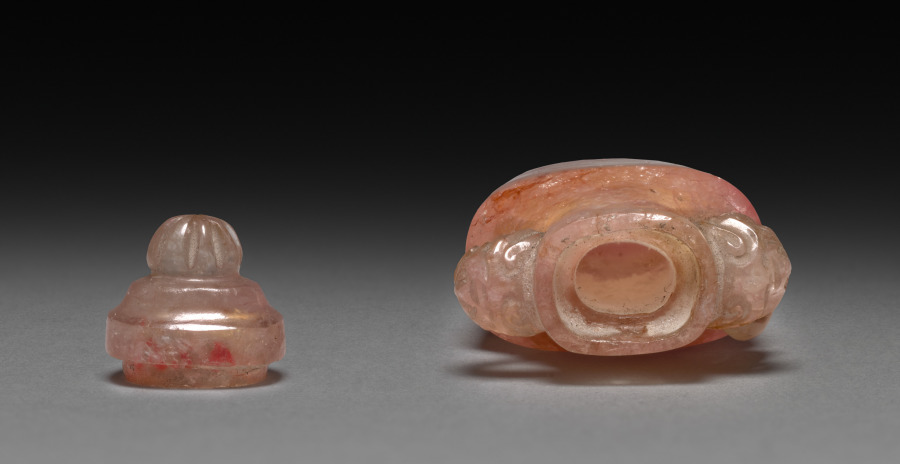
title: Miniature Jar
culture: China, Qing dynasty (1644-1911)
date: 19th-early 20th century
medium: jade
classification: Jade